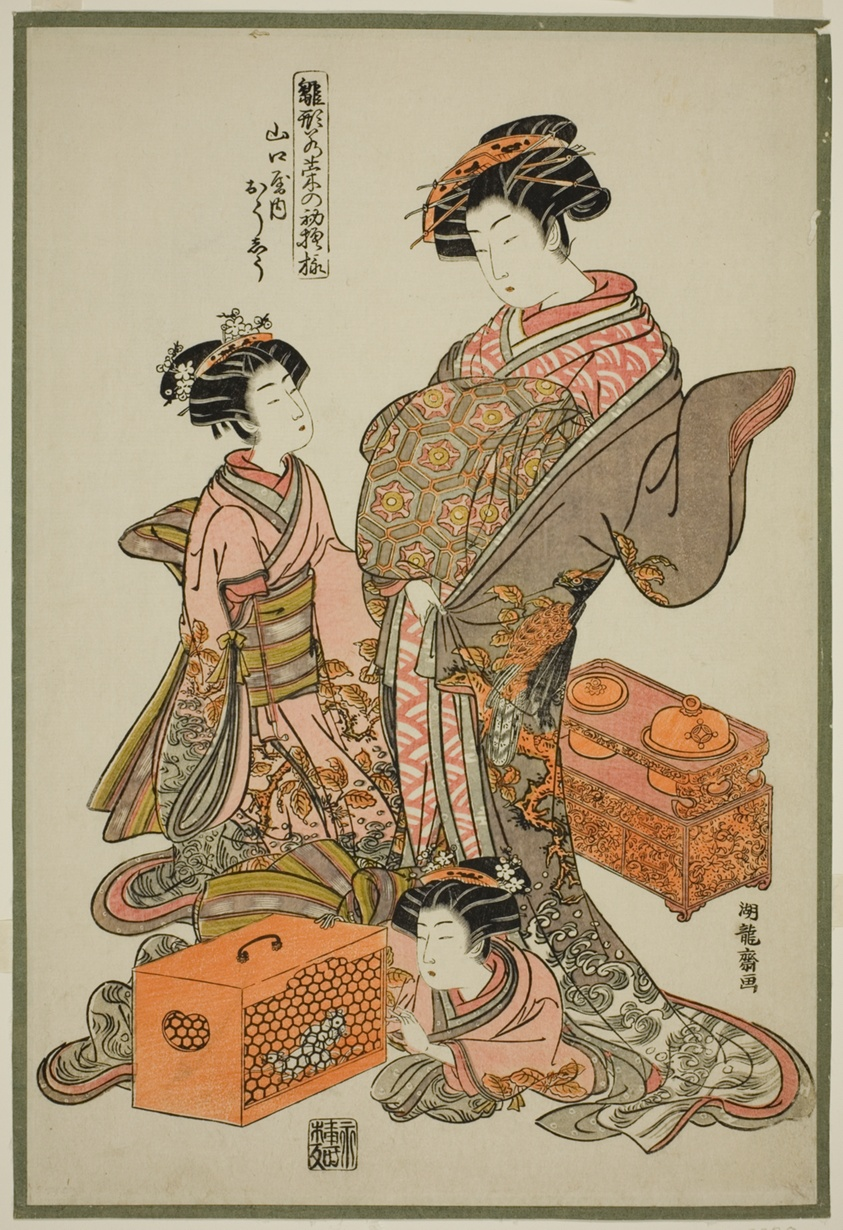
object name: Print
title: Oshu of the Yamaguchiya, from the series "Models for Fashion: New Designs as Fresh as Young Leaves (Hinagata wakana no hatsu moyo)"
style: Japanese (culture or style)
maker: Isoda Koryusai (Japanese, 1735-1790)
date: c. 1777/78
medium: Color woodblock print; oban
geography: Japan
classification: woodblock print; print; asian art